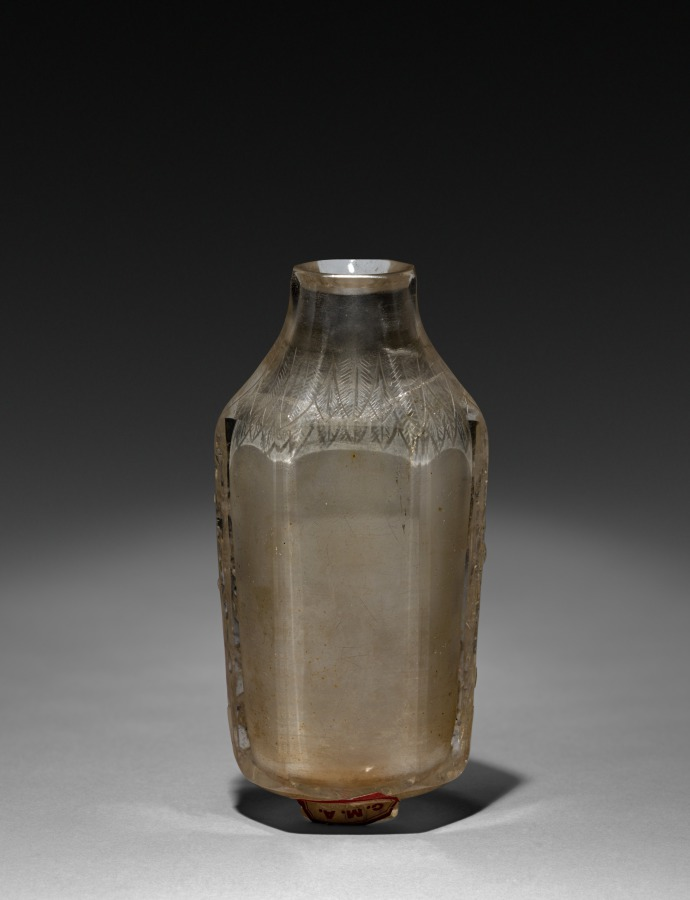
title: Six-Sided Bottle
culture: China, Qing dynasty (1644-1911)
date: 1644–1911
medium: rock crystal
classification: Rock crystal